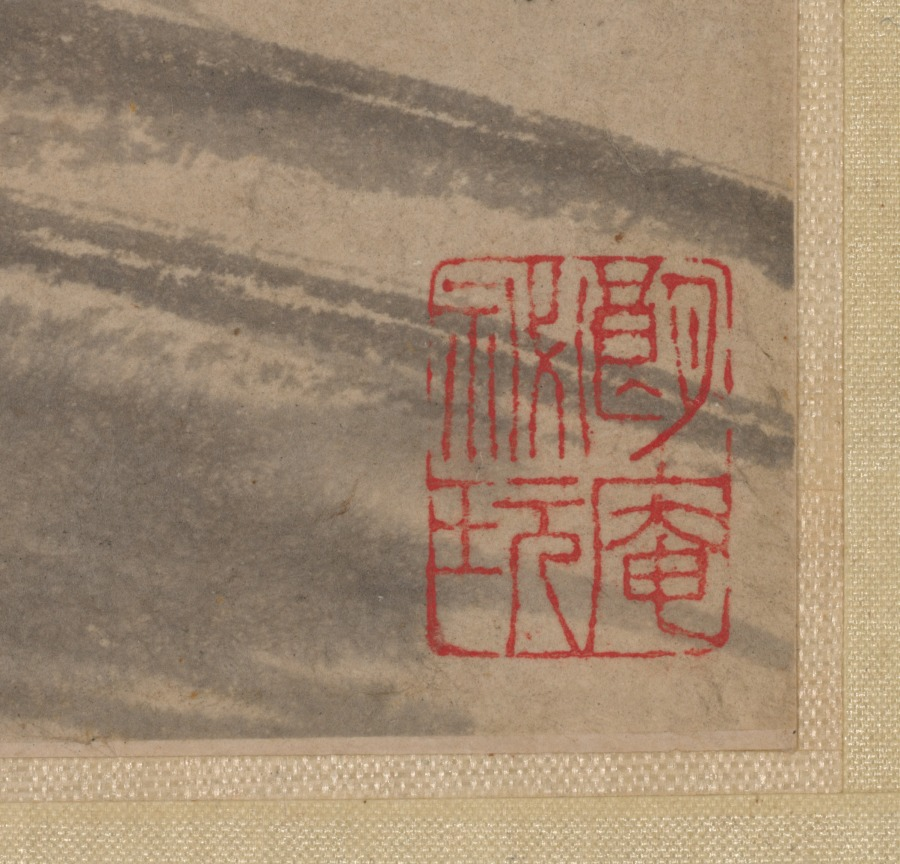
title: Thin Forest and Distant Mountains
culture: China, Ming dynasty (1368–1644)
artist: Li Liufang (Chinese, 1575–1629)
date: 1628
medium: hanging scroll, ink on paper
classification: Painting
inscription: Artist's inscription, signature, and 2 seals: Thin forest and distant mountains have always attracted me; As if they were from the brush and ink of Ni Tsan, left behind by the master in this mortal world. Now that the quiet recluse has chosen to live in the South of the City. He paints the spring breeze---over a curve of the river. In the spring day of the wu-ch'en year [1628] I made this painting and attached an old poem. Li Liu-fang [seals] Li Liu-fang-yin; Chang-heng shih. trans. WKH 1 additional seal of Chung Wen-ming (17th c.).